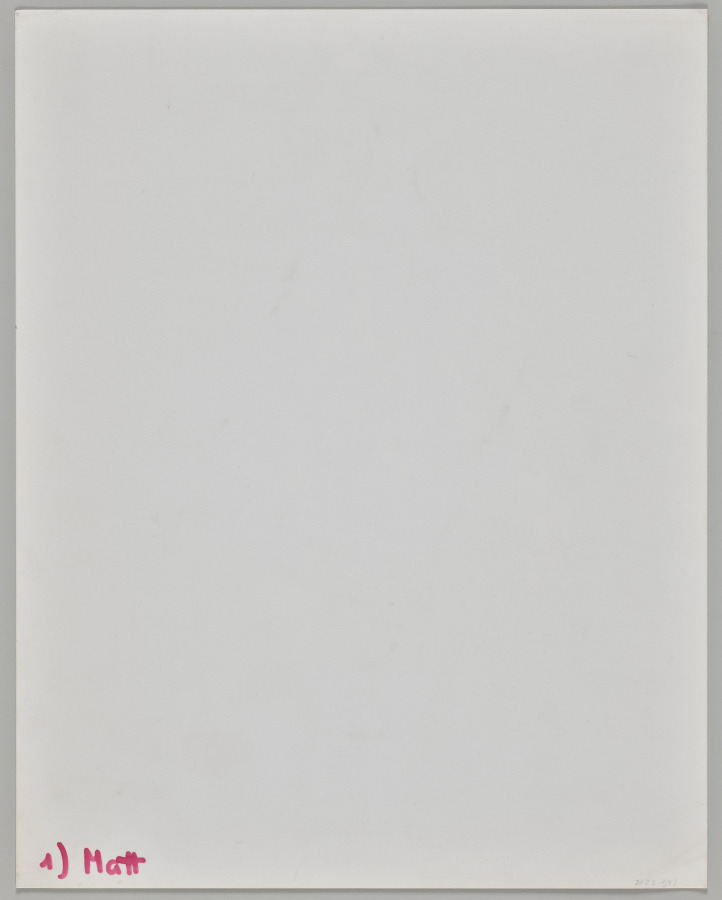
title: Untitled (flower arrangement)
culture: France, 19th century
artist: Adolphe Braun (French, 1812–1877)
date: Early 1850s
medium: albumen print or carbon print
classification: Photograph